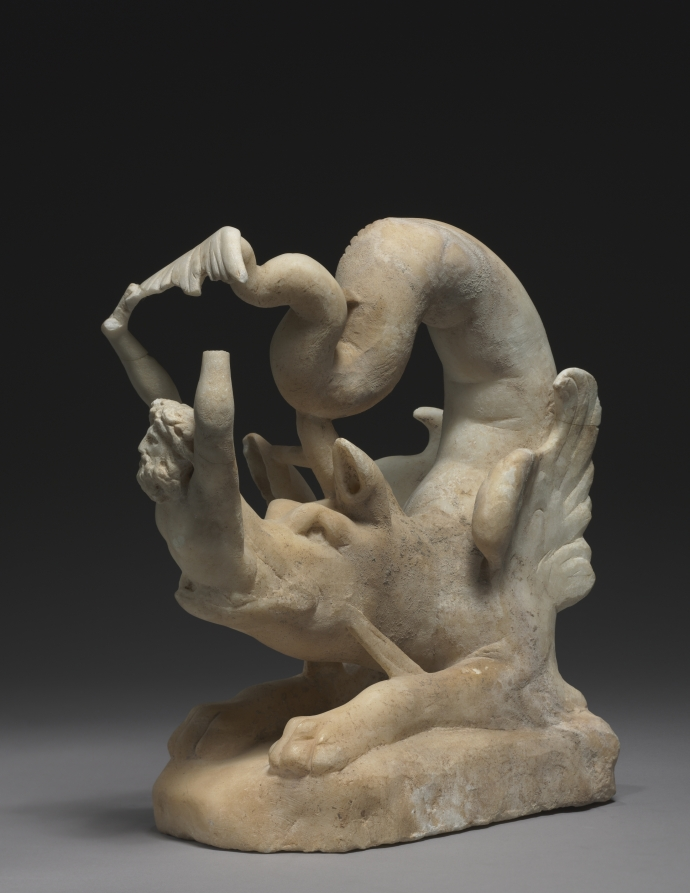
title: Jonah Cast Up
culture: Anatolia, late Roman-early Christian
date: 280–90 CE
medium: marble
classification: Sculpture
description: After disobeying the Lord’s command to proclaim judgment on the city of Nineveh, the Old Testament prophet Jonah was cast into the sea and swallowed by a sea monster. He spent three days praying inside the beast before being cast ashore. Here, the beast spits Jonah out of its mouth.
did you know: The fearsome creature spitting Jonah out of its mouth is a creation of the artist's imagination derived from the ancient Greek cetos, a sea monster. Like other mythical beasts, such as the griffin and the sphinx, this monster combines elements of several different animals. Which ones do you see when looking at this fantastical creature?